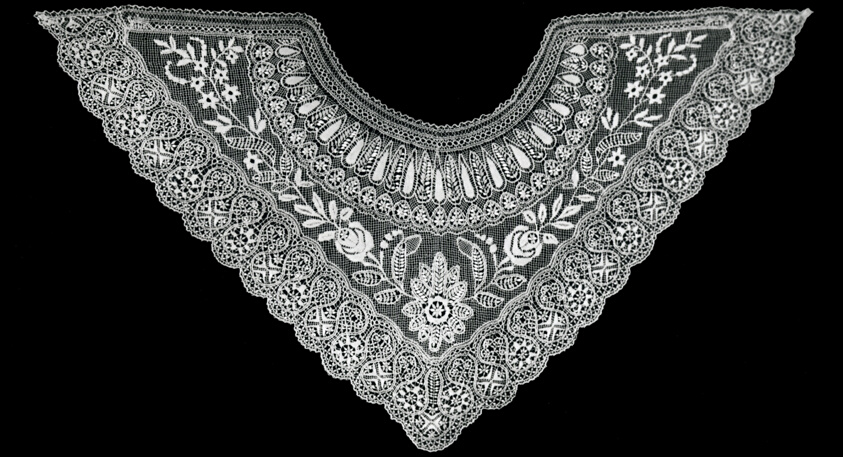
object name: Textile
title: Cape Collar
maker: Malta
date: 1850/75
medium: Silk, bobbin straight lace (in bands)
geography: Malta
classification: textile; lace - bobbin; lace